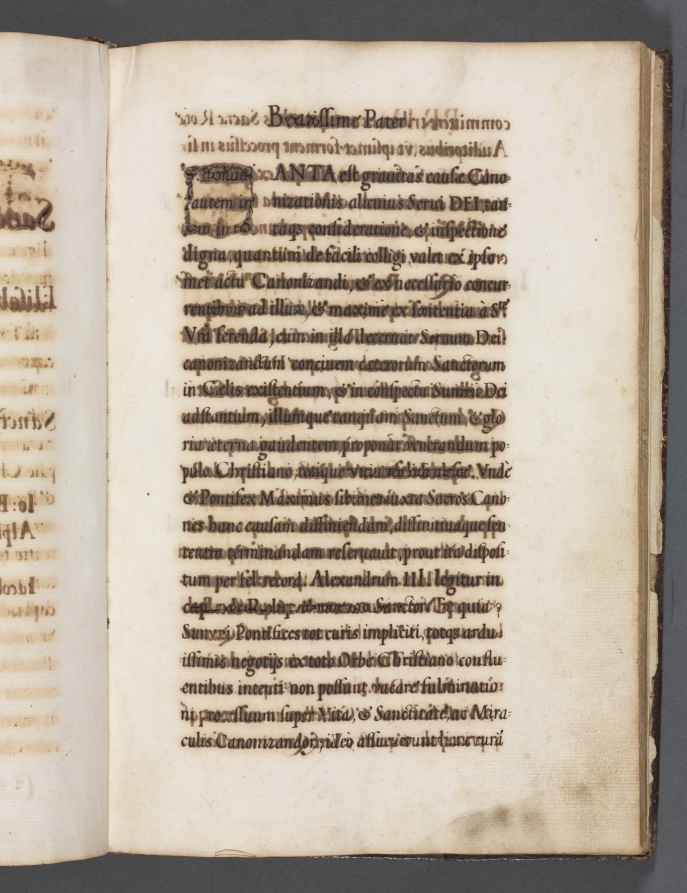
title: Relatio on Saint Elizabeth of Portugal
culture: Italy, Rome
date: c. 1625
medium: manuscript on paper bound in leather with gilt decoration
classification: Manuscript